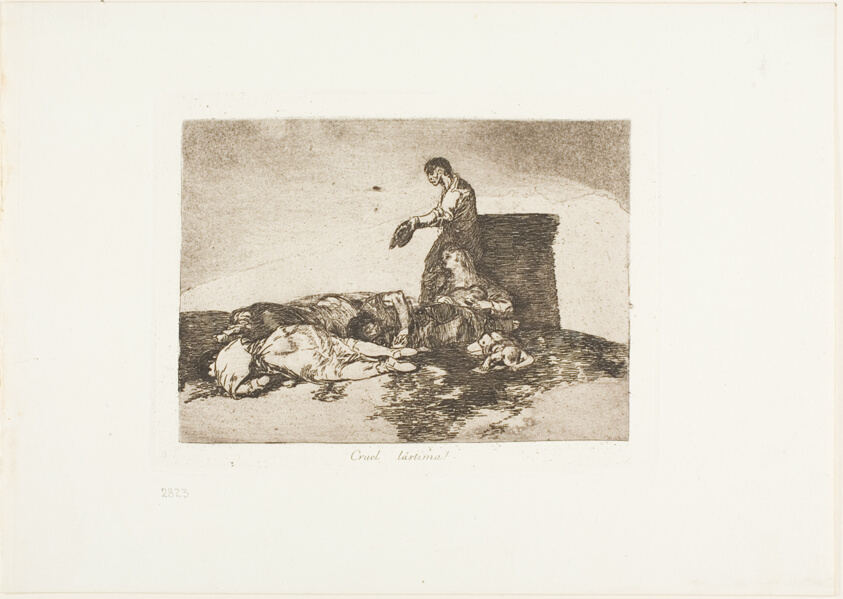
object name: Print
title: Cruel tale of woe!, plate 48 from The Disasters of War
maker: Francisco José de Goya y Lucientes (Spanish, 1746-1828)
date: 1812/15, published 1863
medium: Etching, burnished lavis and burin on ivory wove paper with gilt edges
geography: Spain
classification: etching; print; prints and drawing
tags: war